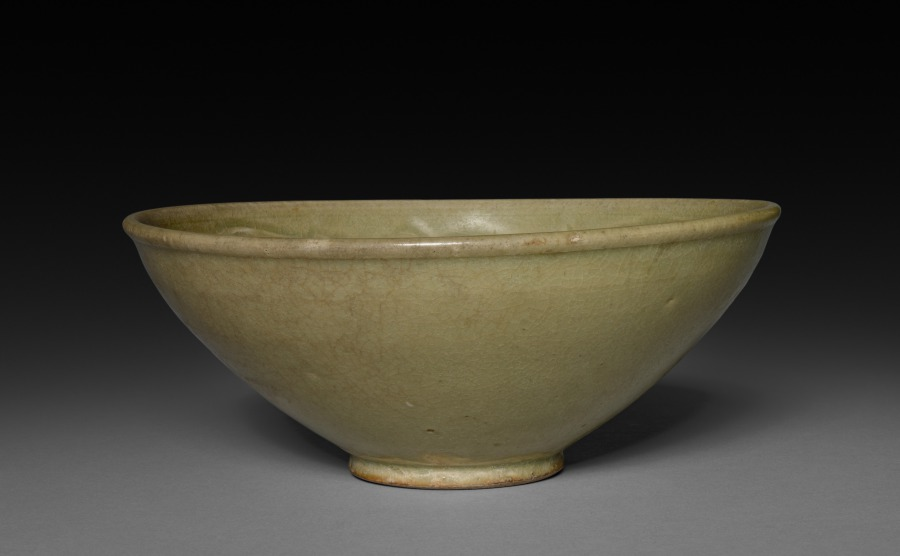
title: Bowl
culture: China, Jin dynasty (1115-1234)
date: 1100s-1200s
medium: Glazed light gray porcelain, Northern Celadon ware, Yaozhou type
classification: Ceramic